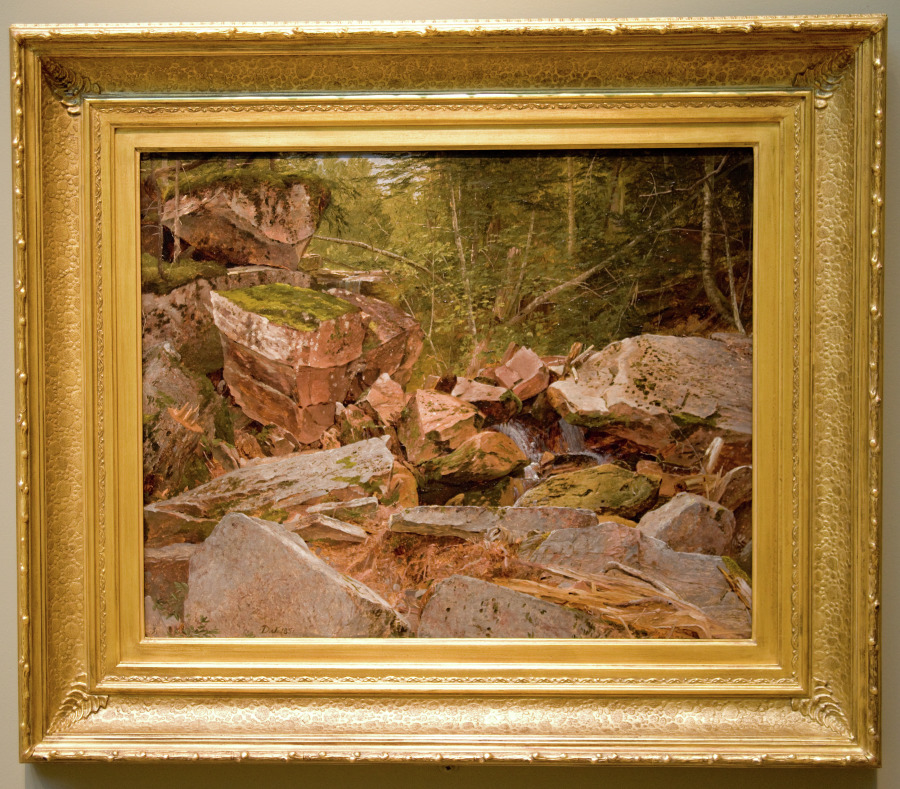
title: Study, North Conway, New Hampshire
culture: America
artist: David Johnson (American, 1827–1908)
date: 1851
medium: oil on canvas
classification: Painting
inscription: Signed lower right: "D. Johnson. / 1851"; inscribed lower left: "D.J. 1851. (false); signed on the back: "Study. North Conway. N.H. / David Johnson 1851]"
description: Johnson’s devotion to carefully observing nature is evident in his detailed rendering of a riverbed. Located in a village that provided a popular jumping-off point for tourists visiting the White Mountains, this untamed site features a haphazard arrangement of angled boulders, slippery moss, splintered tree branches, and dense undergrowth. Contemporary travel guidebooks often cautioned against the physical challenges—and the potential for injury—encountered by venturing into such inner recesses of the woods; one warned that “wild forest-clambering” could be akin to “fighting a phalanx of porcupines.”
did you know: North Conway, New Hampshire, markets itself as the birthplace of American skiing.